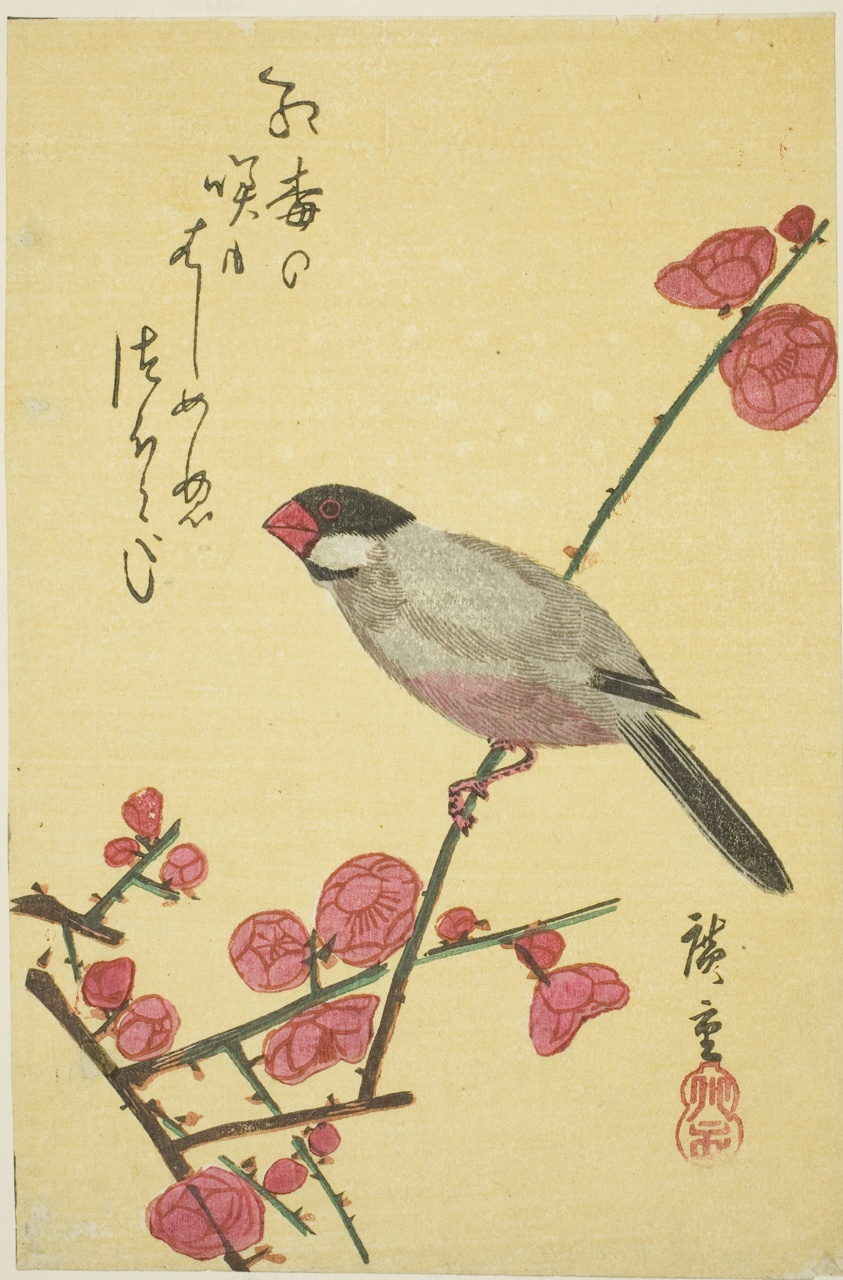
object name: Print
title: Java sparrow on plum branch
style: Japanese (culture or style)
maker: Utagawa Hiroshige 歌川 広重; Japanese, 1797-1858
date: 1830s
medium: Color woodblock print; yotsugiriban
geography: Japan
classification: woodblock print; print; asian art